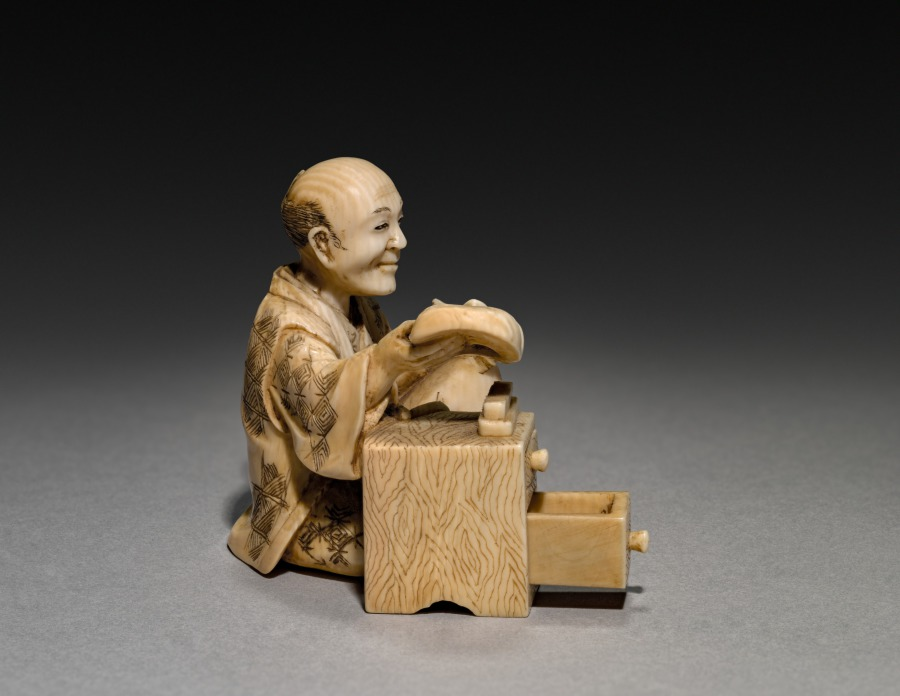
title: The Mask Maker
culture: Japan, Meiji period (1868–1912)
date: late 1800s to early 1900s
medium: ivory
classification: Ivory